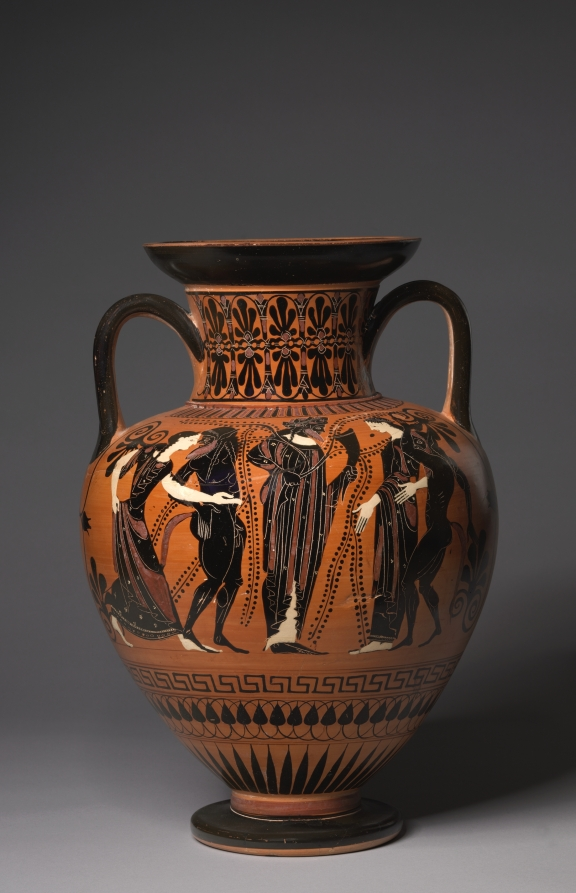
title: Black-Figure Neck-Amphora (Storage Vessel): Herakles and Nemean Lion (A); Dionysos, Satyrs, and Maenads (B)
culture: Greek, Attic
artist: attributed to Painter of Berlin 1899 (Greek, Attic)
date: 515–510 BCE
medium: ceramic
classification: Ceramic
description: The neck-amphora, one of the most popular vase shapes in Archaic Athens, provided painters with ample space for both figural and ornamental decoration. Herakles, the greatest of Greek heroes, performs his most famous deed on the obverse, wrestling the Nemean lion. His patron goddess Athena, together with his nephew Iolaos, holding the hero’s club, stand by. On the other side is an unrelated scene, showing the wine god Dionysos with dancing maenads and satyrs. Abundant ornament covers other areas: stylized lotus blossom and palmette chains on the neck; intricately linked palmettes and lotuses beneath each handle; and a key pattern, linked lotus buds, and rays on the lower body.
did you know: After Herakles strangled the Nemean lion, he wore its pelt as a protective trophy.